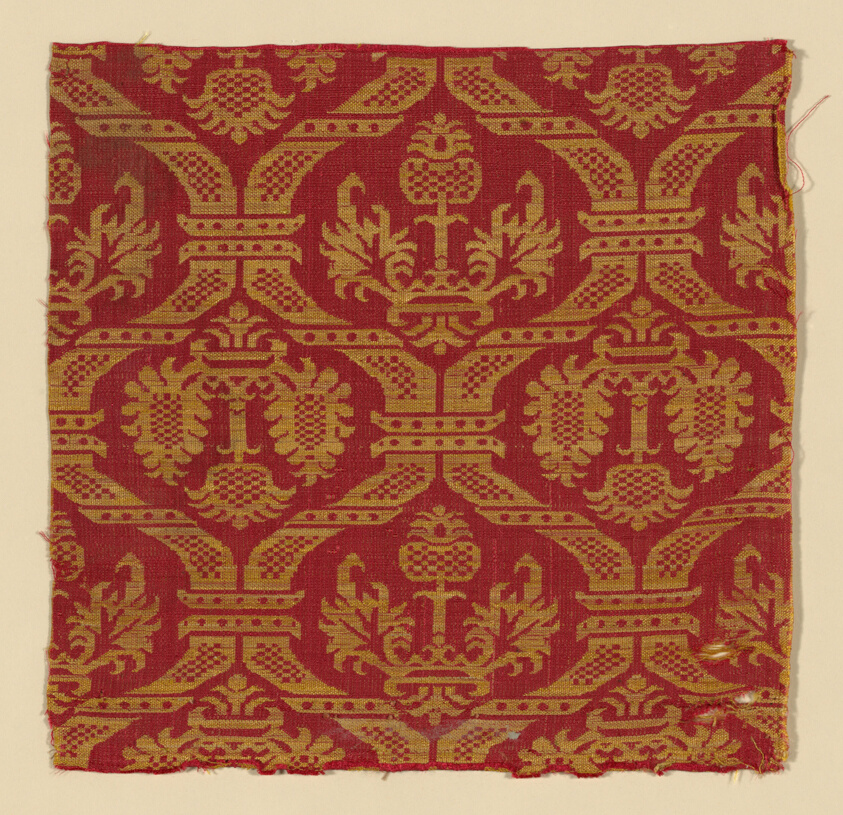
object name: Textile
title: Fragment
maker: Spain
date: 1575/1600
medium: silk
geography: Spain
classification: textile; weaving